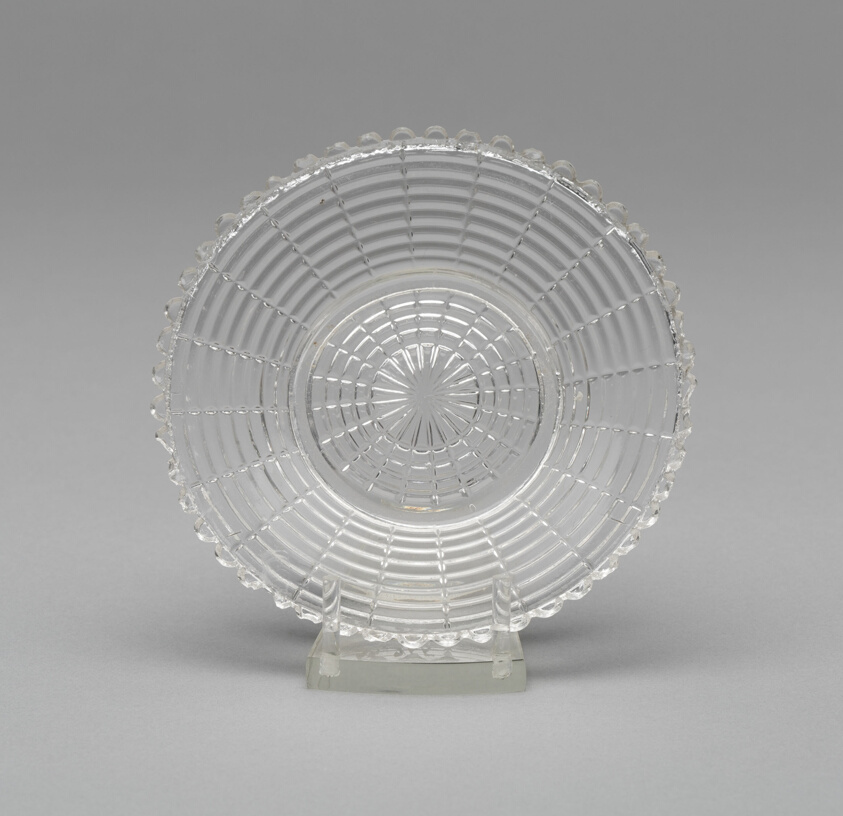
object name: Glass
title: Cup plate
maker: Artist unknown (American, 19th century)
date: 1830–40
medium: Pressed glass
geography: United States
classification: plate (general, dish); glass; american decorative arts; american arts; decorative arts